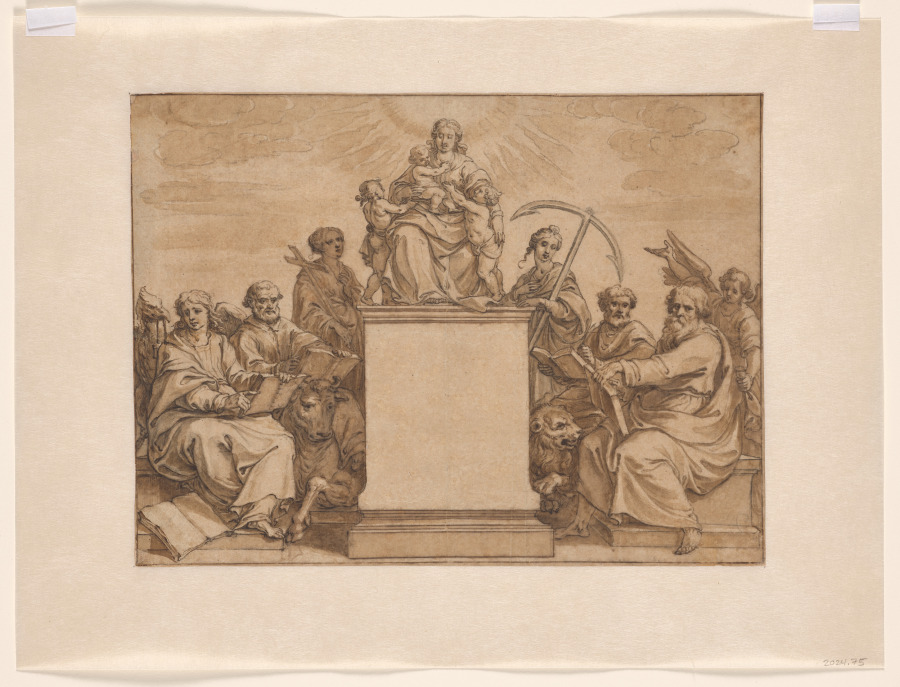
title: The Three Theological Virtures: Faith, Hope, and Charity, Surrounded by the Four Evangelists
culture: Netherlands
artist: Pieter I de Jode (Flemish, 1570–1634)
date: before 1634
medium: Pen and ink, brush and wash over chalk with indications of transfer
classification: Drawing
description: This drawing is a design for a frontispiece, or title page, for the 1639 edition of the Theatrum Biblicum, a pictorial Bible compiled from print series by various artists illustrating the Old and New Testaments. Pieter De Jode the Elder’s monumental figural types depict the three theological virtues: Charity, atop a blank plinth, Hope, on the right, and Faith, on the left, bordered by the four Apostles with their attributes. The plinth was kept blank in order to be filled in with the title of the book (in this case, the New Testament), in the printed version. De Jode spent his career making and publishing prints primarily for the Antwerp book trade, which flourished during the late 16th and 17th centuries.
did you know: In the period, the virtue of Charity, also described as Love, seen here seated atop the plinth, was usually portrayed as a woman tending to three children.